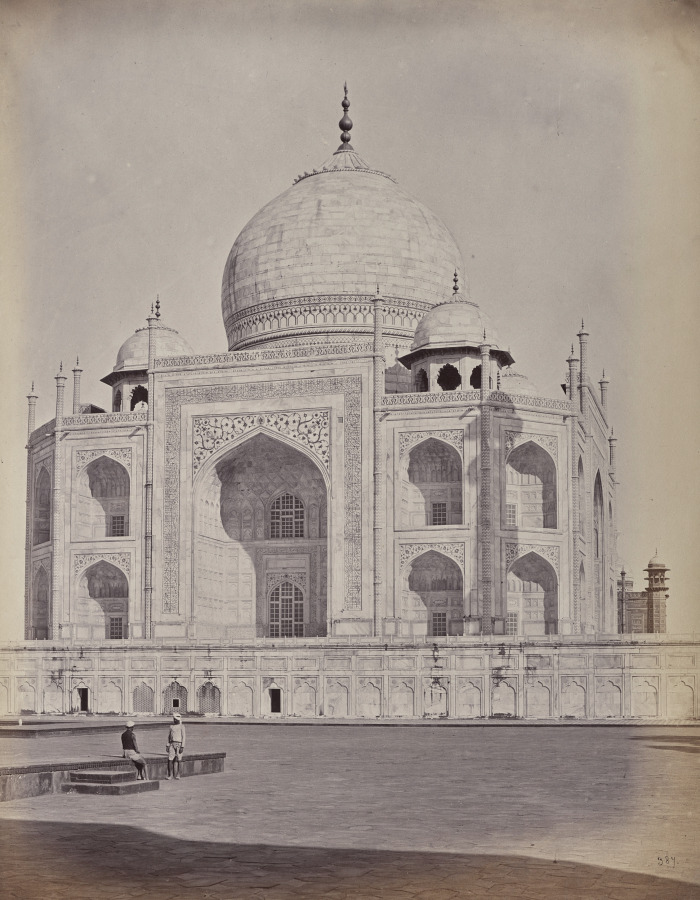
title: Agra. The Taj, the Central of Principal City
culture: England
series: Photographs of Northern India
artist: Samuel Bourne (British, 1834–1912)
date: 1863–70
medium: albumen print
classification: Photograph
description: The 50 images in this album, all taken in the 1860s, move from the hill towns of the Himalayas down to cities including Lahore (now in Pakistan), Delhi, Lucknow, Agra, Benares (now Varansi), and Calcutta (now Kolkata). Architectural studies of major monuments offer valuable historical records of what sites such as the Taj Mahal and the imperial mosque of the Mughal emperors in Delhi looked like before twentieth-century restorations.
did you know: Samuel Bourne, the author of most the images in this album, was a banker in England before he moved to India to become a professional photographer.